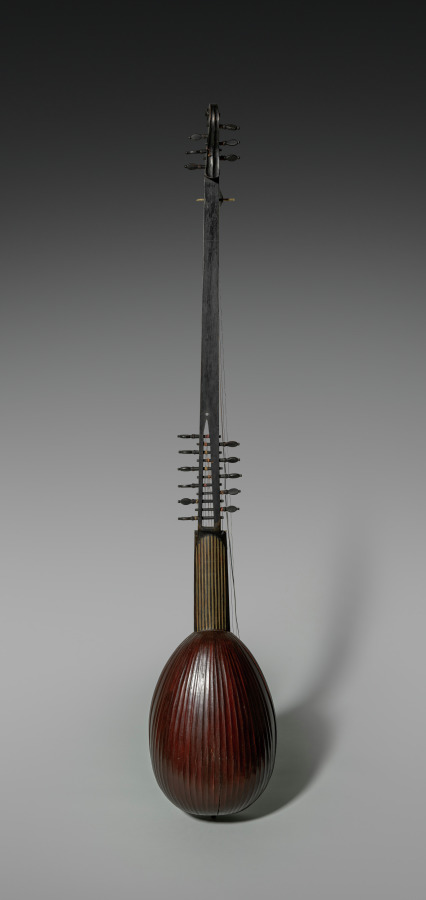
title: Chitarrone (or Archlute)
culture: Italy, Rome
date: late 1600s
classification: Musical Instrument